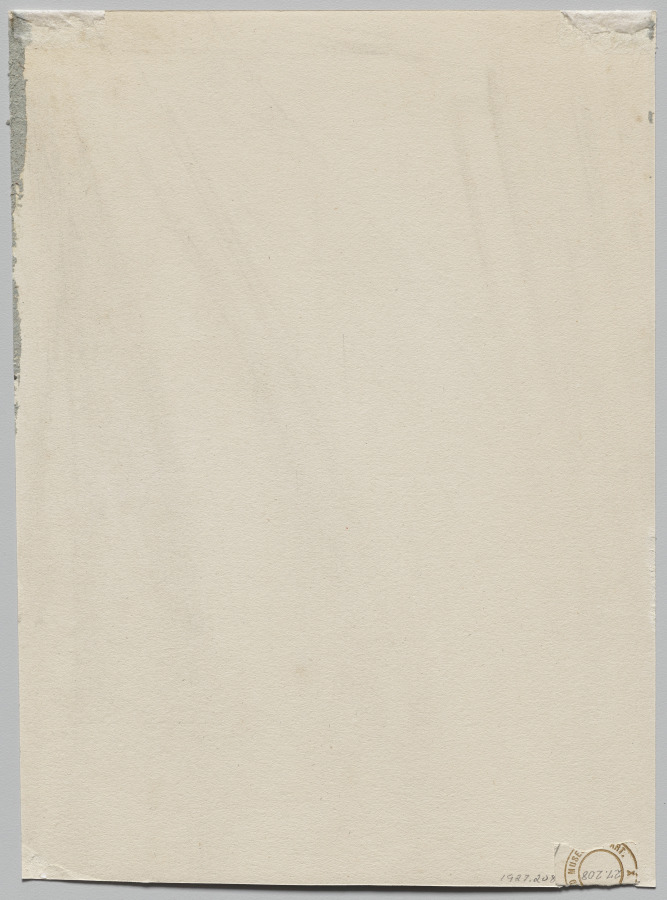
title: Art Lovers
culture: France, 19th century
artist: Honoré Daumier (French, 1808–1879)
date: c. 1863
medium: Gray and black wash, charcoal, and graphite, with watercolor, on cream laid paper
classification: Drawing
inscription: signed, lower left, in black ink: h.D.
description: Honoré Daumier was known for his witty depictions of contemporary Parisian types, including the art collectors seen in this drawing. The sheet belongs to a series in which the artist depicted these connoisseurs in the process of closely studying works of art. Although here, the men's focus seems sincere, in many works Daumier caricatured his subjects' greediness, smugness, or obliviousness.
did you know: Honoré Daumier produced watercolors primarily for collectors of his work, suggesting that this image, somewhat ironically, was intended to be sold to the very figures it depicts.